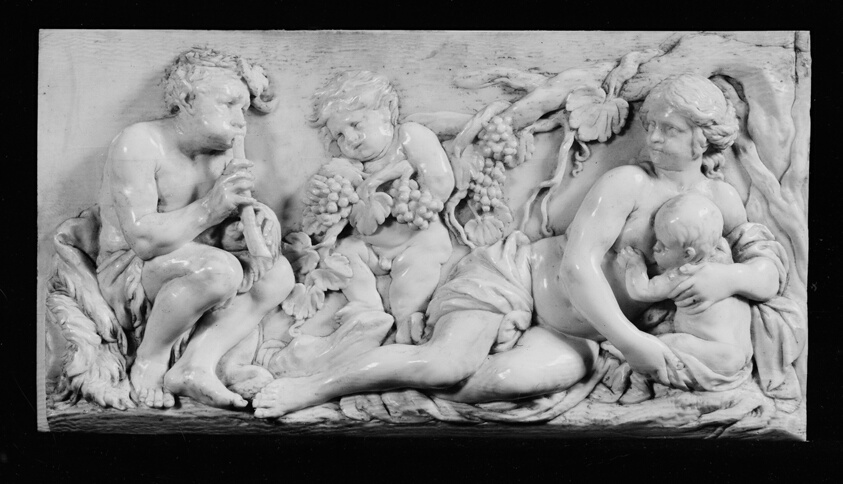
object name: Sculpture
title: Bacchic Scene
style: 17th Century, Flemish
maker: Flemish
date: 1625/75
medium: Ivory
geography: Flanders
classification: relief; sculpture; flemish; ivory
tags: celebrations, cloth, trees, instruments, music, musical instruments, children, nudes, wine, vines, grapes, child, woman